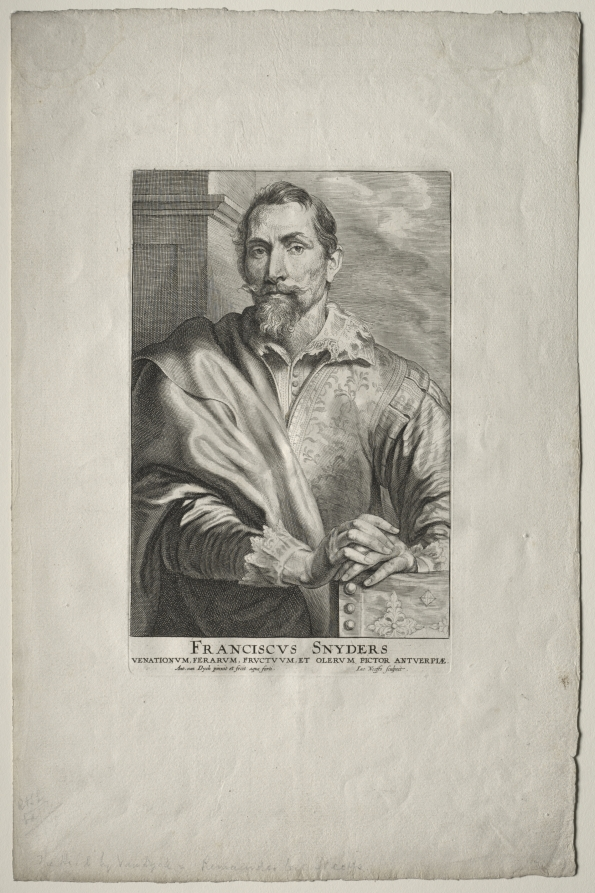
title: Frans Snyders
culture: Flanders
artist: Anthony van Dyck (Flemish, 1599–1641)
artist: and Jacobus Neeffs (Flemish, 1610–after 1660)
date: 1930–33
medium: etching and engraving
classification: Print